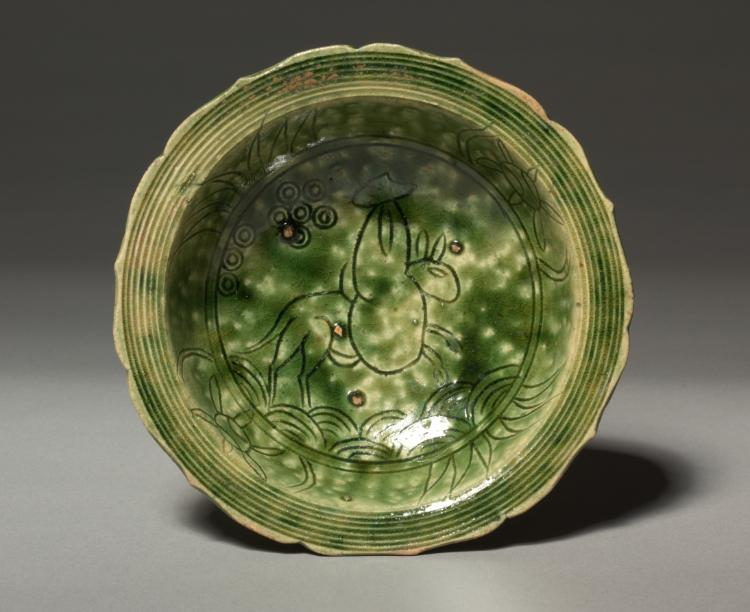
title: Dish with Incised Design of a Rider on a Mule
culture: Japan, Momoyama period (1573–1615)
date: c. 1600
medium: Buff stoneware covered with copper-green glaze (Mino ware, Oribe type)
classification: Ceramic